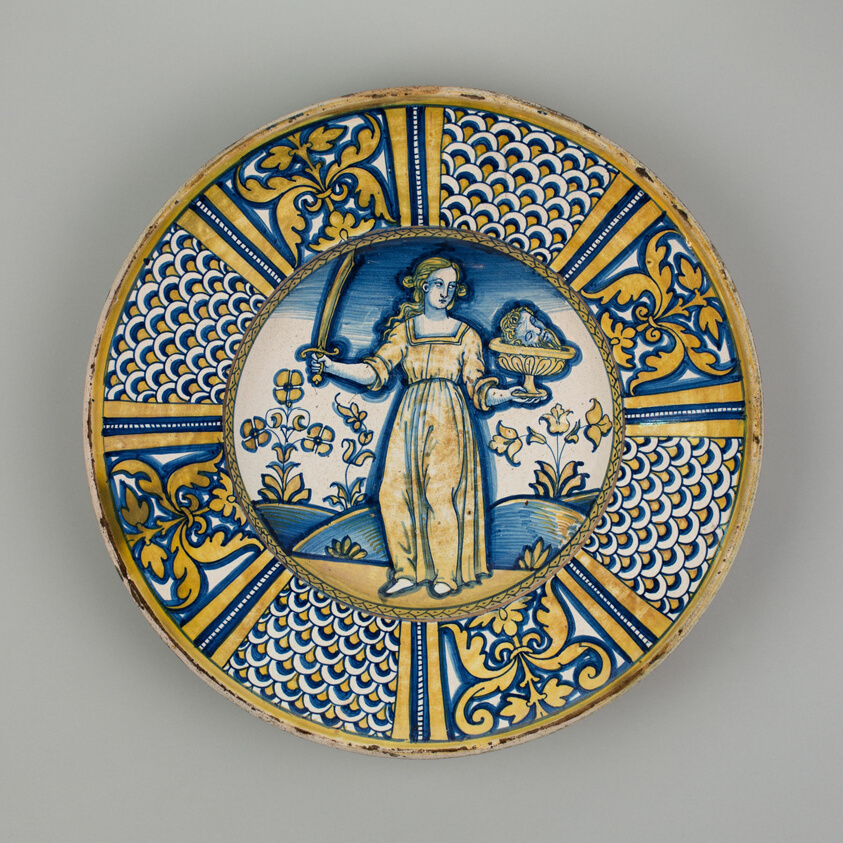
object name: Ceramics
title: Display Plate with Judith Holding the Head of Holofernes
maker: Italian; Deruta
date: 1500/1530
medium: Tin-glazed earthenware with copper luster (maiolica)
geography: Deruta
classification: ceramics; european decorative arts; decorative arts